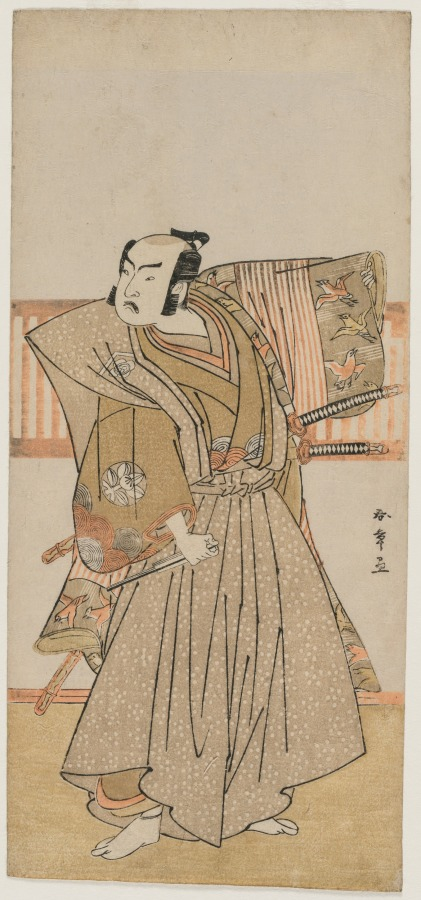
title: Ichimura Uzaemon IX as Soga no Juro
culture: Japan, Edo period (1615–1868)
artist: Katsukawa Shunshō (Japanese, 1726–1792)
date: mid 1770s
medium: color woodblock print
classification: Print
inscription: Signature: Shunsho ga